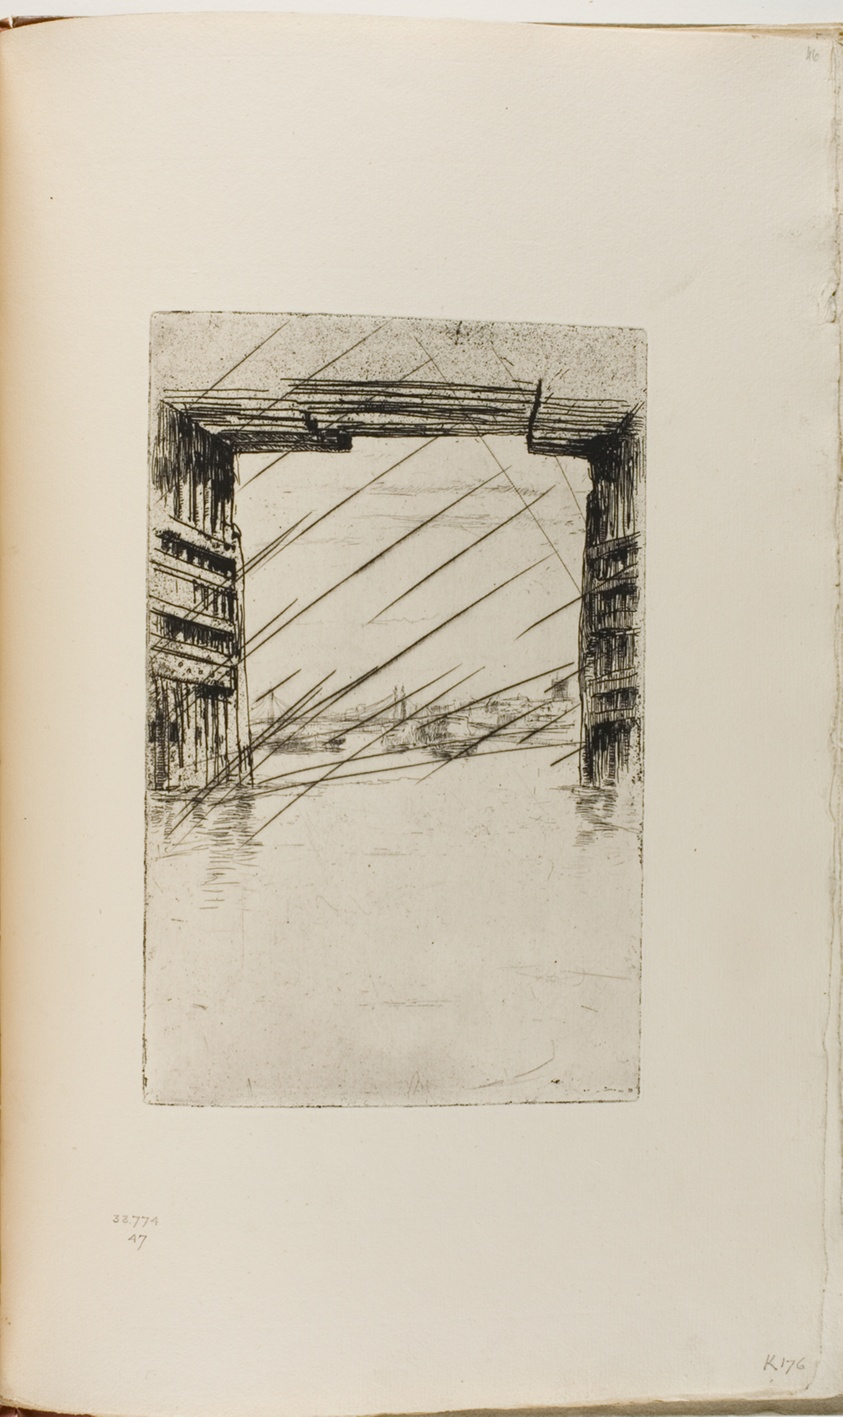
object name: Print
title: Under Old Battersea Bridge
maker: James McNeill Whistler (American, 1834-1903)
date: 1876/78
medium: Etching, drypoint and open bite, with foul biting, with drypoint cancellation, in black ink on ivory laid paper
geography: United States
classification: etching; open bite; prints and drawing; book; foul biting; drypoint; print; paper